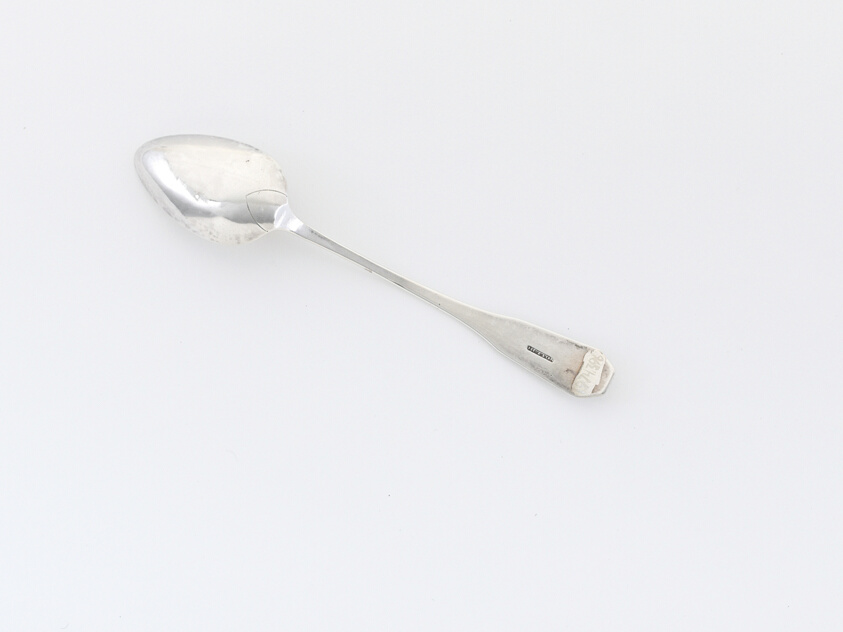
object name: Metalwork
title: Teaspoon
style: 19th century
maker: Isaac Hutton (American, 1767–1855); Albany, New York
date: c. 1805–15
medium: Silver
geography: Albany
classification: spoon; silver; utensil; american decorative arts; american arts; decorative arts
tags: dining, spoon